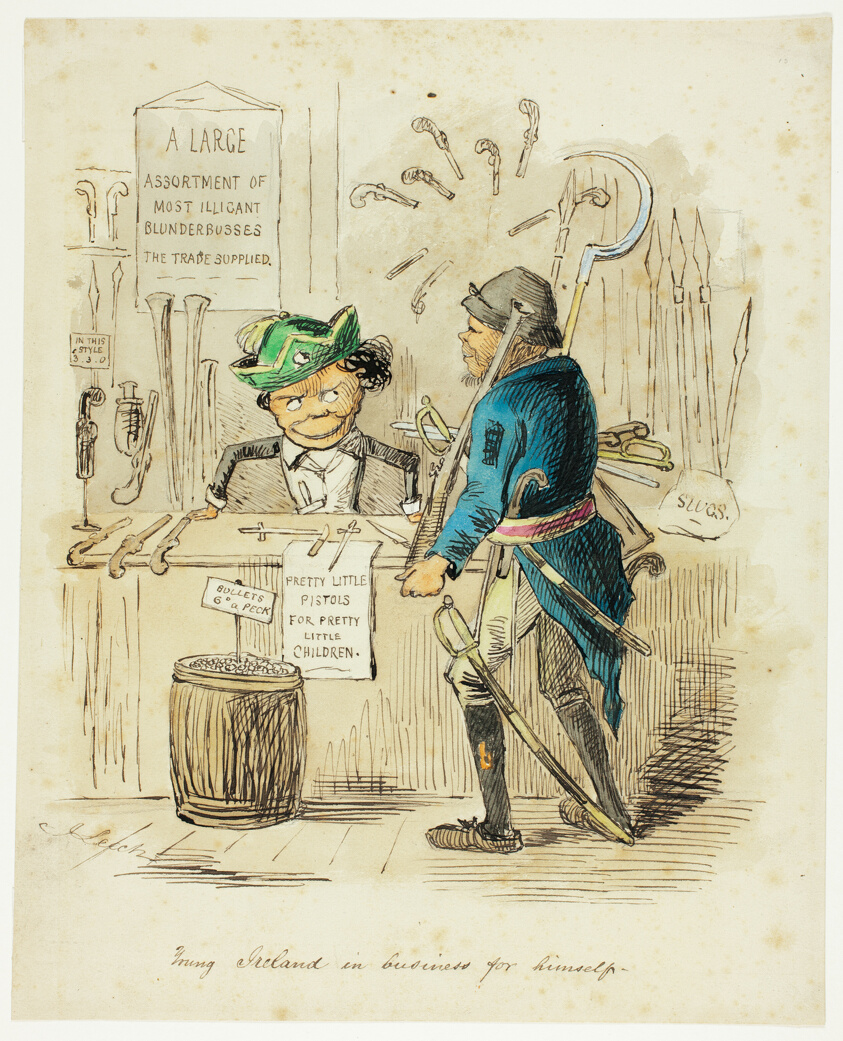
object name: Drawing and Watercolor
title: Young Ireland in Business for Himself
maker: John Leech (or possibly after); English, 1817-1864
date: 1850/59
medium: Watercolor and pen and brown ink, over graphite, on cream wove paper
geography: England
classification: watercolor; drawings (visual works); prints and drawing